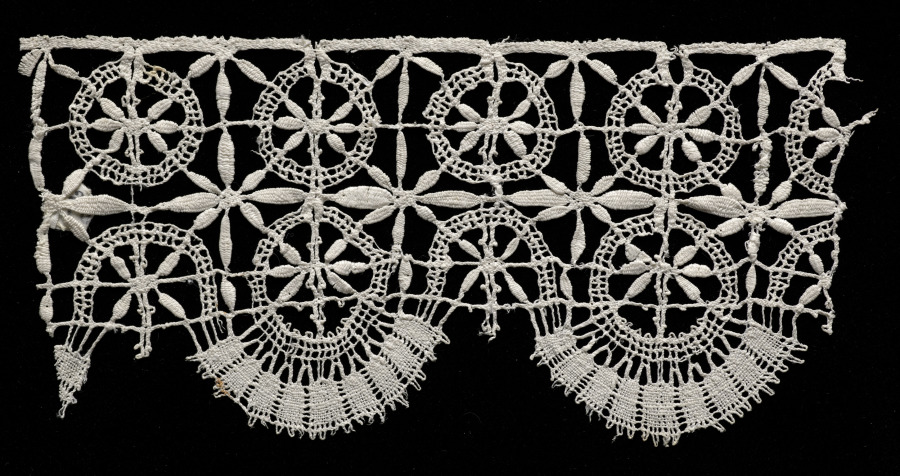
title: Lace Edging with Bell Points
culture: Italy, Genoa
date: 1600s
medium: Bobbin lace (rose lace)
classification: Lace